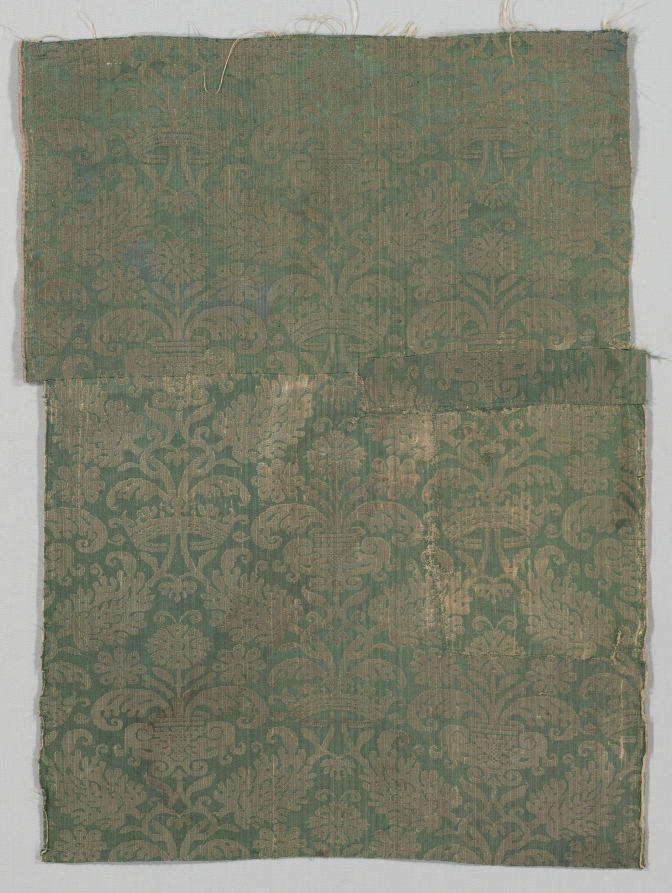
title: Two Lengths of Textile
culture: Italy or Spain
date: 1500s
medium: damask, silk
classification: Textile